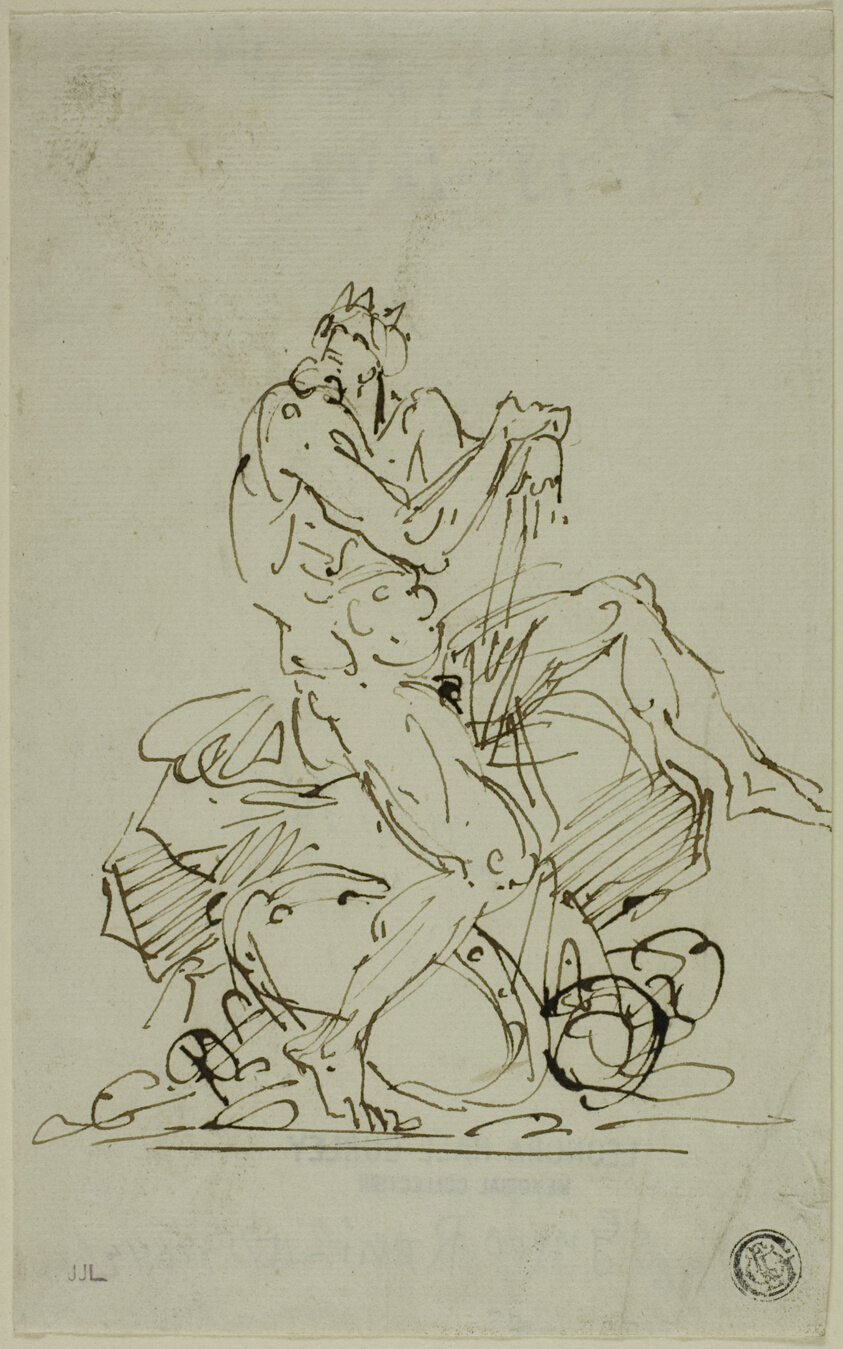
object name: Drawing and Watercolor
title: Neptune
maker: Unknown Artist (Italian, 18th century); or Guido Reni (Italian, 1575-1642)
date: 18th century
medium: Pen and brown ink on ivory laid paper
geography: Italy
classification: pen and ink drawings; drawings (visual works); prints and drawing